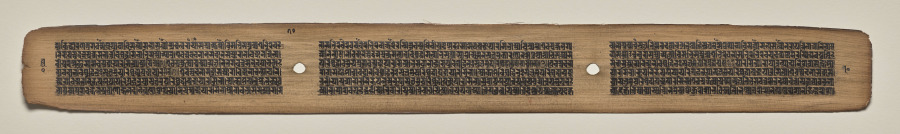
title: Text, Folio 70 (verso), from a Manuscript of the Perfection of Wisdom in Eight Thousand Lines (Ashtasahasrika Prajnaparamita-sutra)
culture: Eastern India, Bihar, Vikramashila Monastery. Painting: Nepal, Kathmandu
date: Sunday, September 14, 1119 (year 239 of the Newar Samvat in the month of Ashvina)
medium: gum tempera and ink on palm leaves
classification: Painting